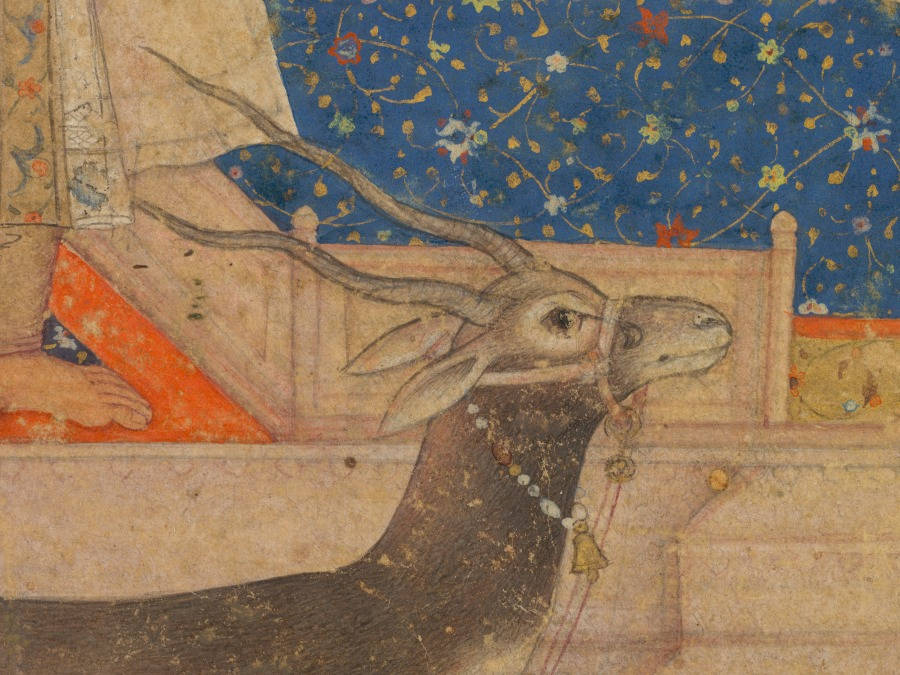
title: Akbar and Jahangir Examine a Ghir Falcon while Prince Khusrau Stands Behind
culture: Mughal India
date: c. 1602–4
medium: gum tempera and gold on paper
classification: Painting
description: Emperor Akbar sits against a purple bolster under a canopy looking aged and careworn, probably not long before his death. He examines a trained falcon of the type that the Mughals used in hunting. This falcon appears to be from Akbar’s son, Prince Salim, who stands before him in a gesture of gift-giving. A stately black antelope, a wild animal now a pet, harnessed and wearing a bell, crouches at the foot of the steps leading up to the canopied platform.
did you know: Salim rests his hand on a sharply pointed dagger in a red velvet sheath.